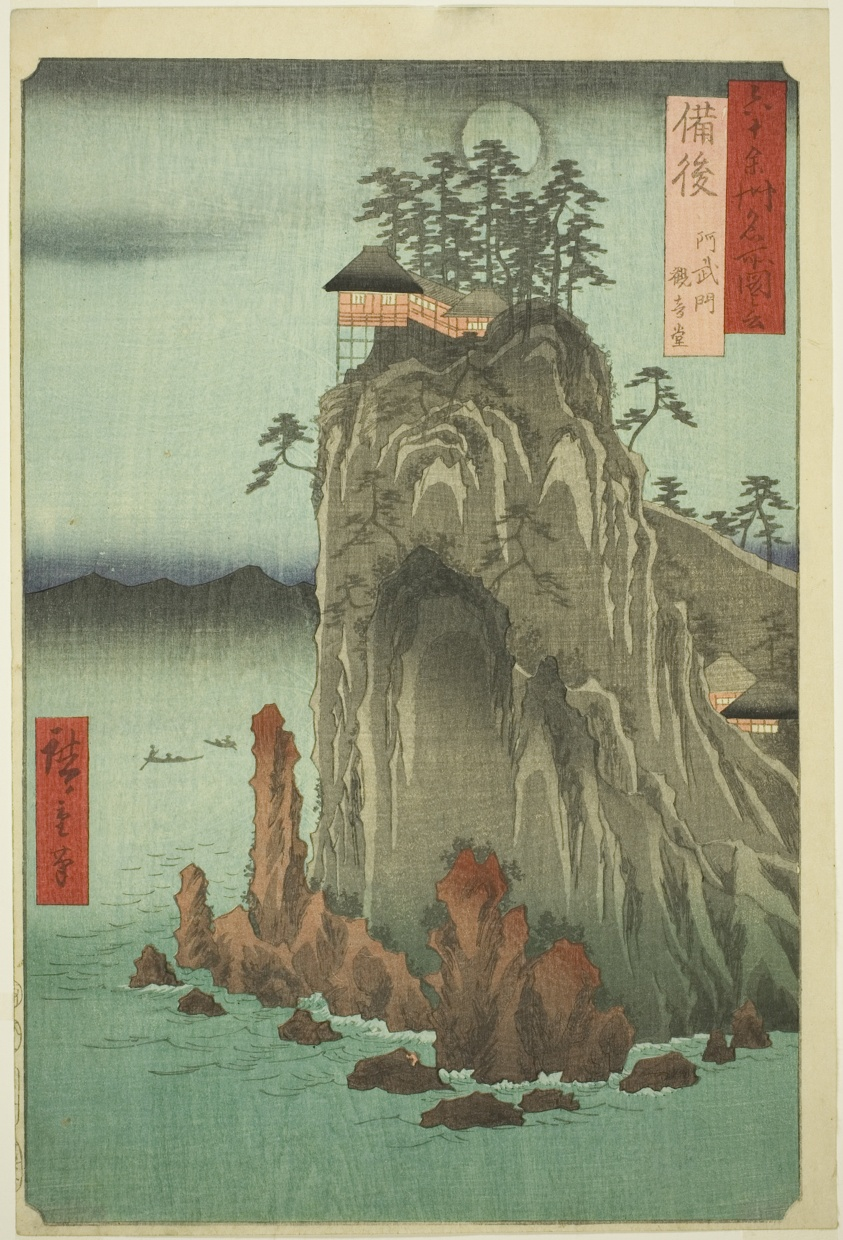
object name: Print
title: Bingo Province: Kannon Temple at Abuto (Bingo, Abuto, Kannondo), from the series "Famous Places in the Sixty-odd Provinces (Rokujuyoshu meisho zue)"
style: Japanese (culture or style)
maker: Utagawa Hiroshige 歌川 広重; Japanese, 1797-1858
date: 1853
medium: Color woodblock print; oban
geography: Japan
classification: woodblock print; print; asian art